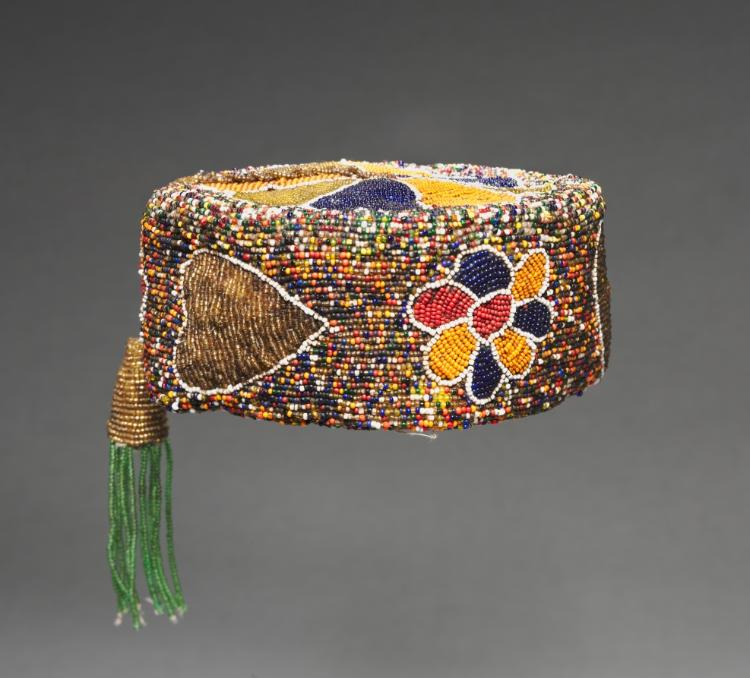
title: Coronet (oríkògbófo)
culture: Africa, West Africa, Nigeria, Yorùbá-style maker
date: 1900s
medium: Cloth, glass beads, and thread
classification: Garment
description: Like the rare conical crown (ade), the coronet (oríkògbófo) may only be worn by a king descended from Oduduwa, the first king of the Yorùbá. While the crown is reserved for special occasions, the coronet may be used by the king for less formal public events and when entertaining non-Yorùbá visitors. It signifies wealth rather than royal status.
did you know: The beads on this sculpture were imported, likely from Venice or Bohemia (now called the Czech Republic).